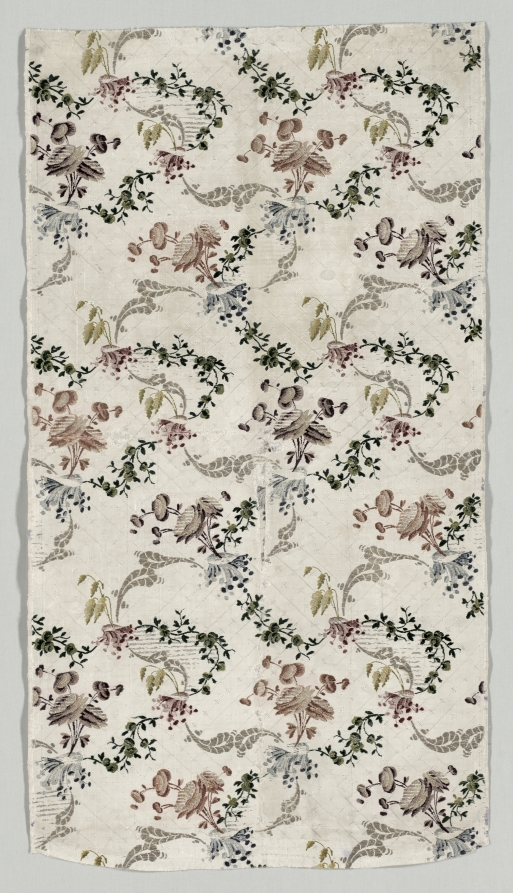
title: Length of Brocaded Silk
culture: France, 18th century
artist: style of Jean Baptiste Pillement (French, 1728–1808)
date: 1723–1774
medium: brocade; silk, gold and silver threads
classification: Textile